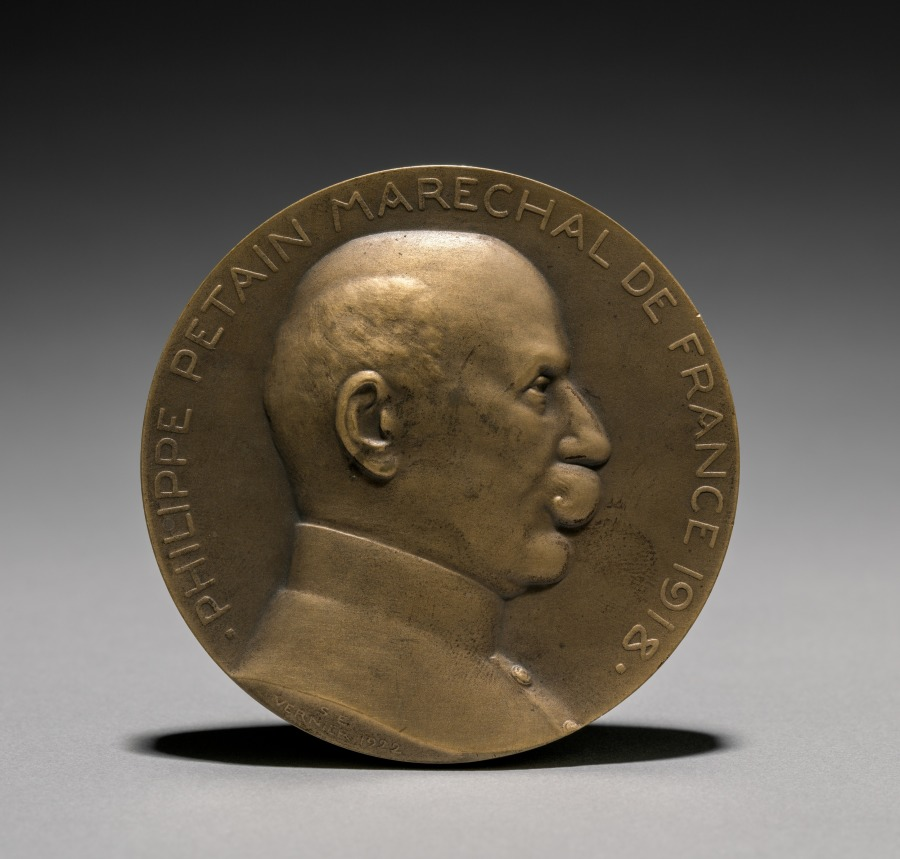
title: Petain Medal (obverse)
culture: France, early 20th century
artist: Èmile Séraphin Vernier (French, 1852–1927)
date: 1922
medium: bronze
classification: Metalwork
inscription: "Philippe Petain Marechal de France, 1918."